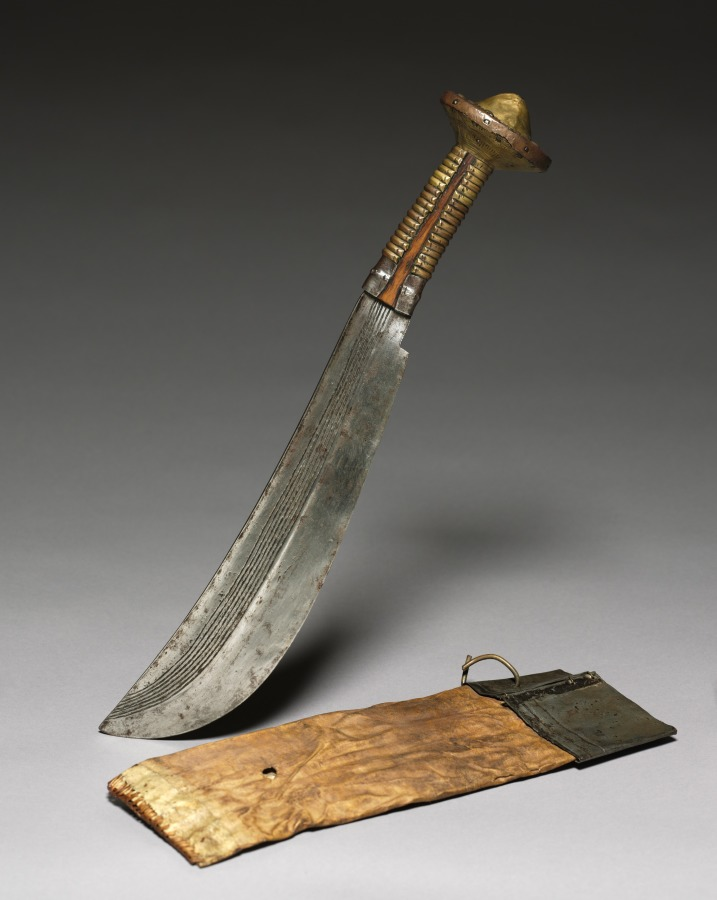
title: Knife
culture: Africa, Central Africa, Democratic Republic of Congo, unknown maker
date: 1800s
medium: Iron, wood, copper alloy, metal, rawhide, and plant fiber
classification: Arms and Armor